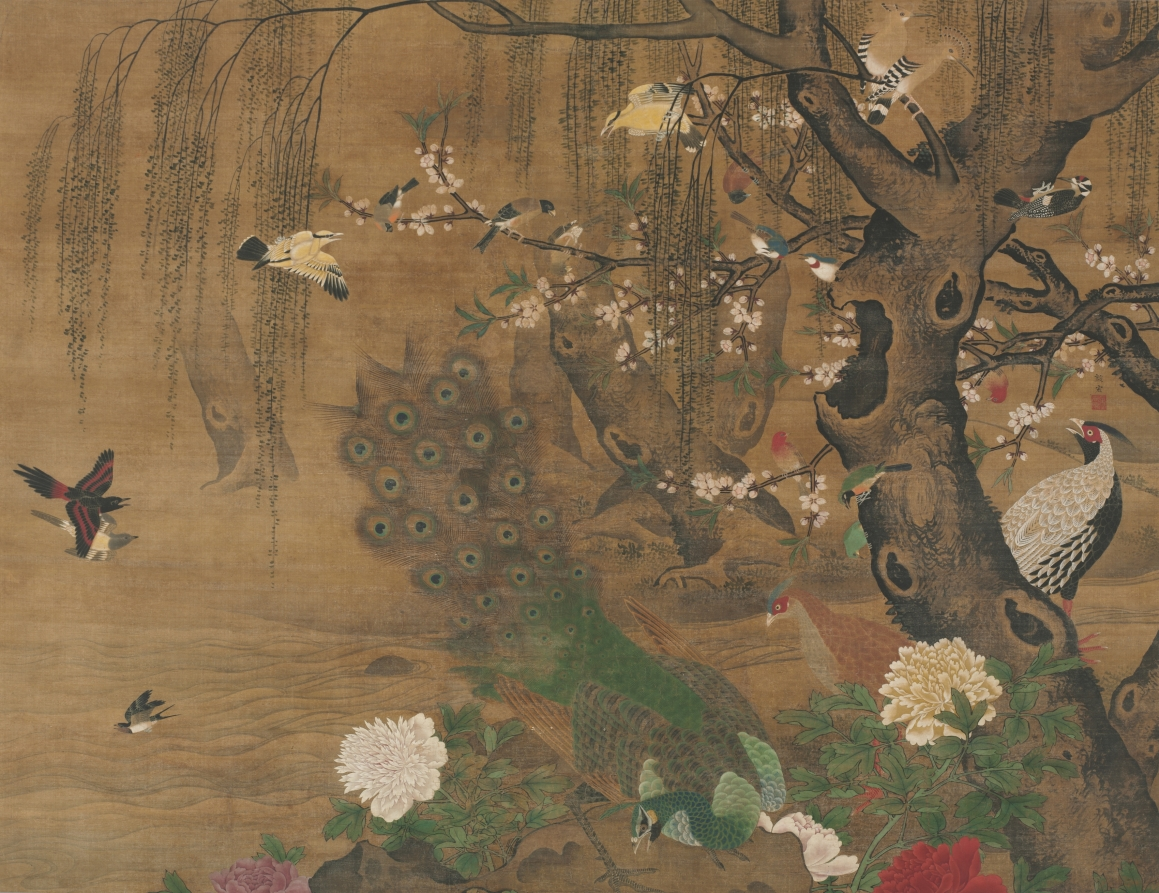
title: Birds Gather under the Spring Willow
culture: China, Ming dynasty (1368–1644)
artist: Yin Hong (Chinese, c. 1430-c. 1500)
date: late 1400s-early 1500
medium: hanging scroll, ink and color on silk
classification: Painting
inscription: 殷宏. [印]金臺世家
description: This scroll depicts a spring scene with all kinds of birds, including one peacock with a hen among peonies. The painting is one of four surviving works by Yin Hong bearing his signature and seals. Some scholars debate whether this work depicts the theme “One Hundred Birds admiring the Phoenix,” a metaphor for human society presenting an idealized hierarchy under imperial rule; other scholars argue that peafowls, as exotic birds not native to China, would not be depicted to represent the emperor. This large painting might have been hung in a palace hall and may have been part of a set depicting the four seasons.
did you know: The peahen is plucking a dandelion.